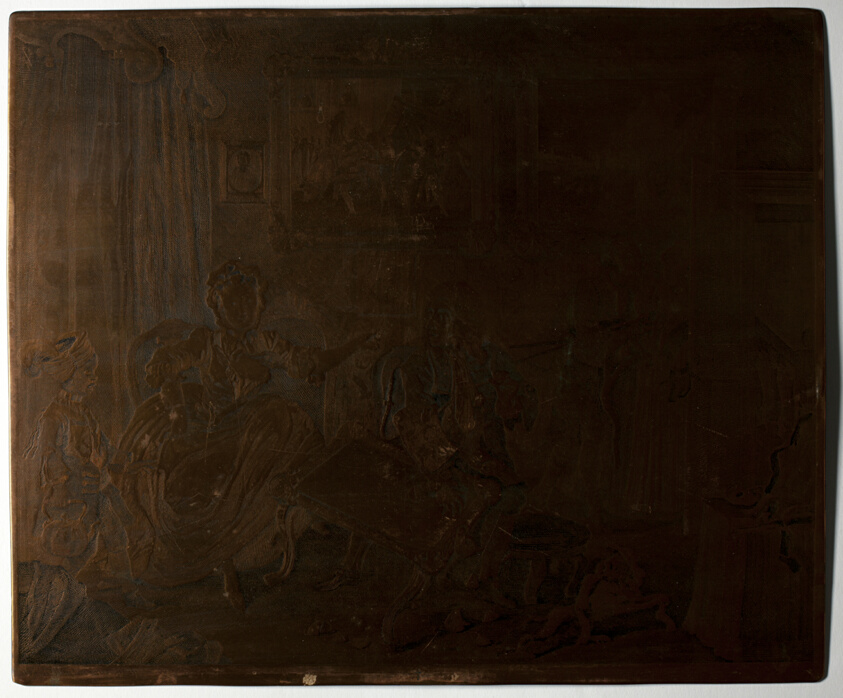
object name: Print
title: Plate two, from A Harlot's Progress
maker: William Hogarth (English, 1697-1764)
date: 1732, reworked/reissued 1744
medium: Copperplate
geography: England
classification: etching; print; prints and drawing